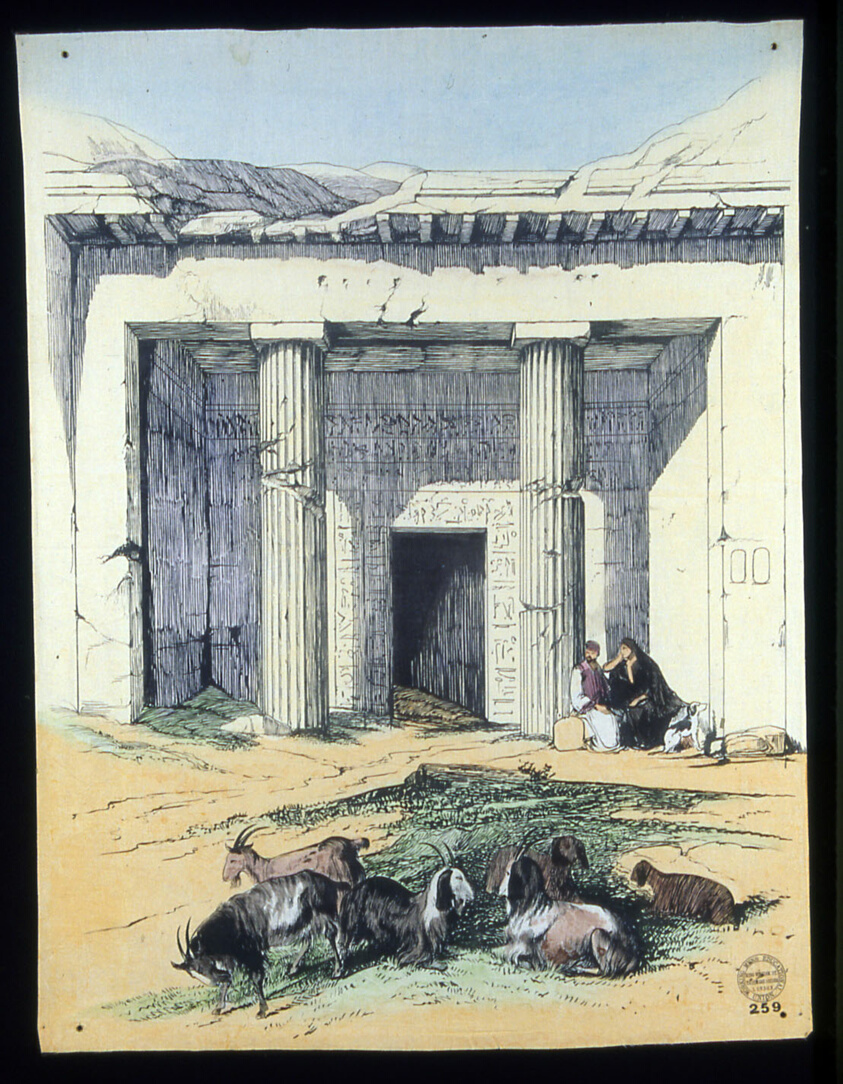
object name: Textile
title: Panel (Furnishing Fabric)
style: egyptian revival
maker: England, London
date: c. 1850s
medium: Cotton, plain weave; painted with pigment and ink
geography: London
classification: textile; weaving - printed; furnishing textile